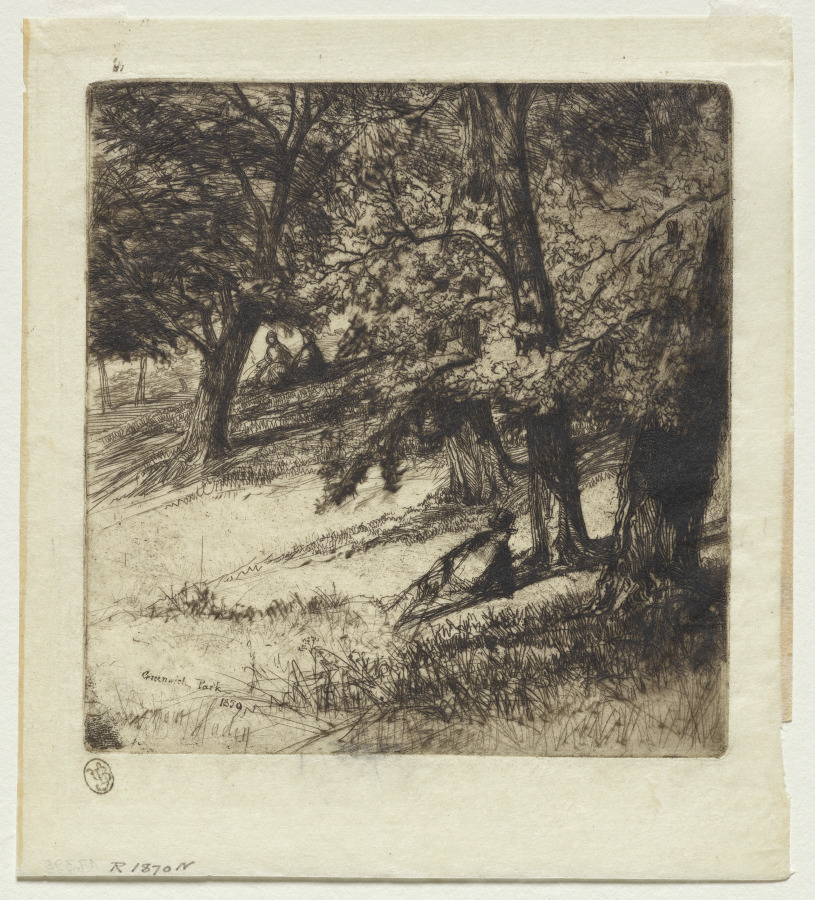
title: Sub Tegmine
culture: England, 19th century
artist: Francis Seymour Haden (British, 1818–1910)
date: 1859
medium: etching and drypoint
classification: Print